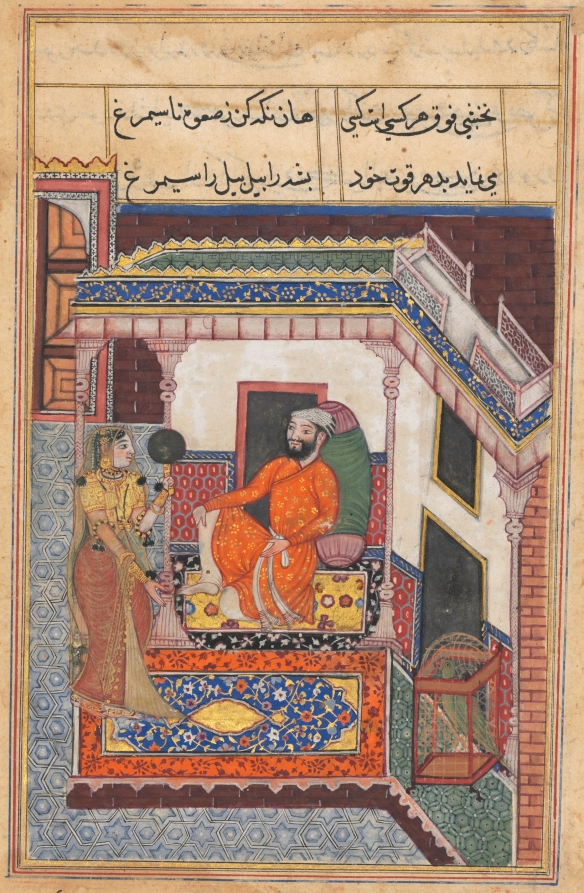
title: The parrot laughs on hearing the Raja of Ujjain’s wife admire her beauty in a mirror, from a Tuti-nama (Tales of a Parrot: Forty-sixth Night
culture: Mughal India, court of Akbar (reigned 1556–1605)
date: c. 1560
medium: gum tempera, ink, and gold on paper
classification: Painting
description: The raja’s wife claims to be the most beautiful woman in the world. The parrot laughs at her arrogance and tells them of a girl living in an underground kingdom whose beauty is incomparable. From the parrot’s words alone, the raja becomes obsessed with the girl and leaves to seek her company.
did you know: The mirror that the raja’s wife is holding is painted with silver and would have once looked reflective but has since tarnished.